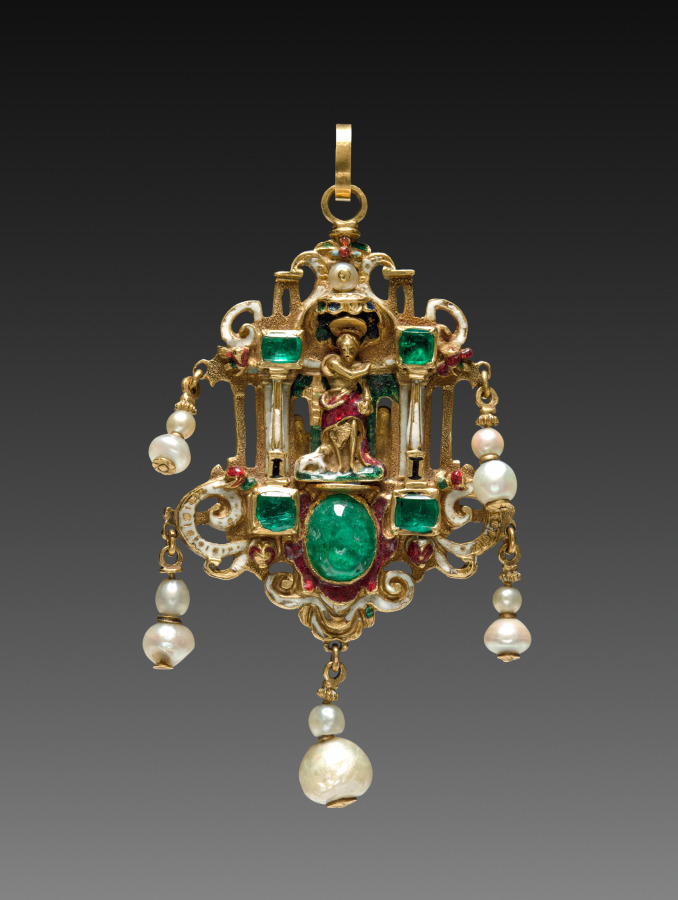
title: Pendant with Saint John the Evangelist (reverse)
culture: Italy, late 16th century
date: late 1500s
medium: enameled gold with pearls and emeralds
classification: Jewelry